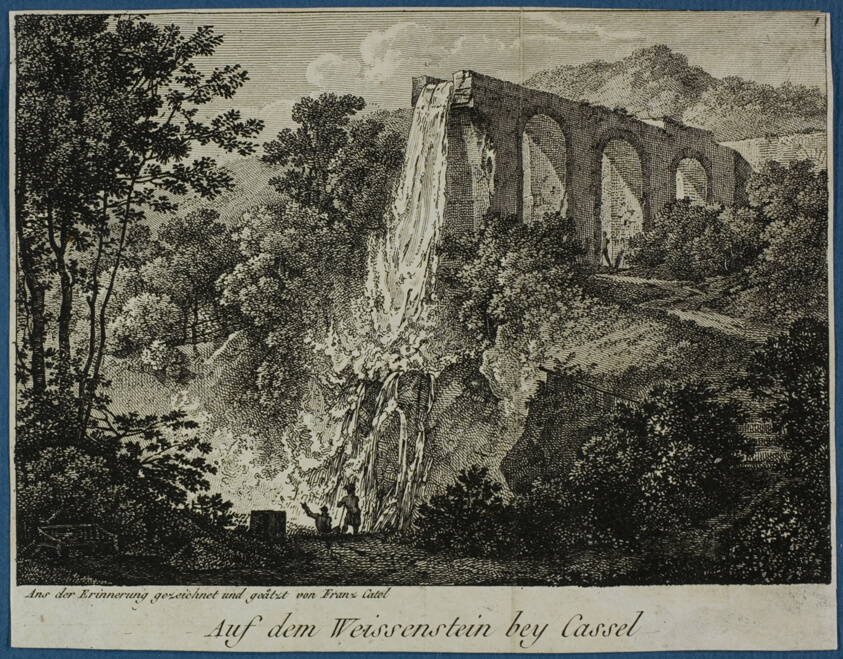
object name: Print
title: View of the Weissenstein Near Cassel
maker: Franz Ludwig Catel (German, 1778-1856)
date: 1880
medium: Etching on paper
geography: Germany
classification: etching; print; prints and drawing